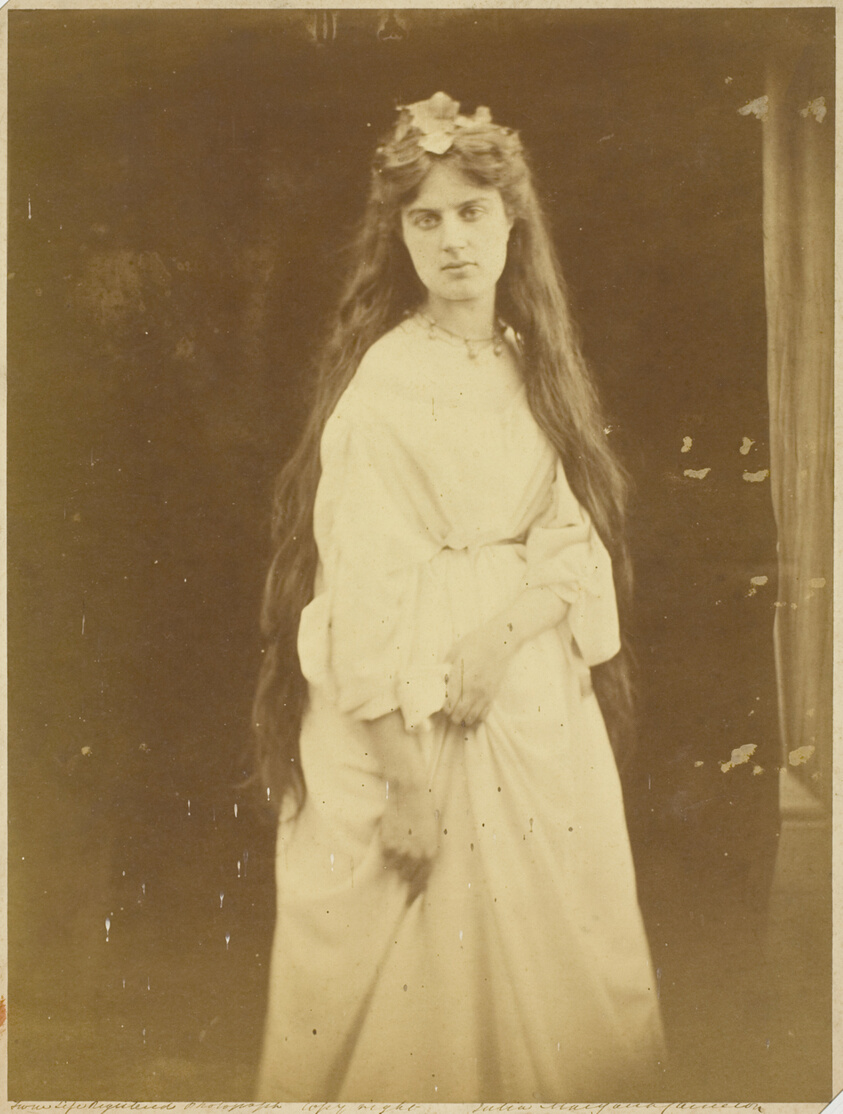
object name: Photograph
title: Marie Spartali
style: 19th century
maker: Julia Margaret Cameron (English, 1815–1879)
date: September 1868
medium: Albumen print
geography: England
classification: albumen silver print; photographic process; photography; photograph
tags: portraits, portraits: female subject, photography